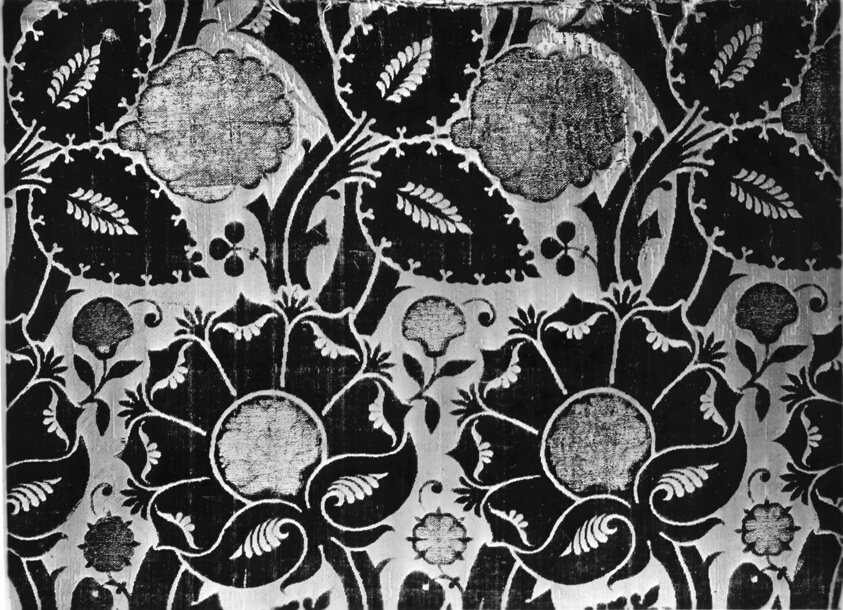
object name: Religious/Ritual Object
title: Cope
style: 15th century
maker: Italy, probably Venice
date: 1460-70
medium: Silk and gilt-metal-strip-wrapped silk, warp-float faced 4:1 satin weave with supplementary brocading wefts bound by main warps in weft-float faced 1:4 'S' twill interlacings and with supplementary pile warps forming cut voided velvet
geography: Venice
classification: weaving - velvet; liturgical; textile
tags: vestments, botanical/floral, flowers, foliage, fruit, pomegranates